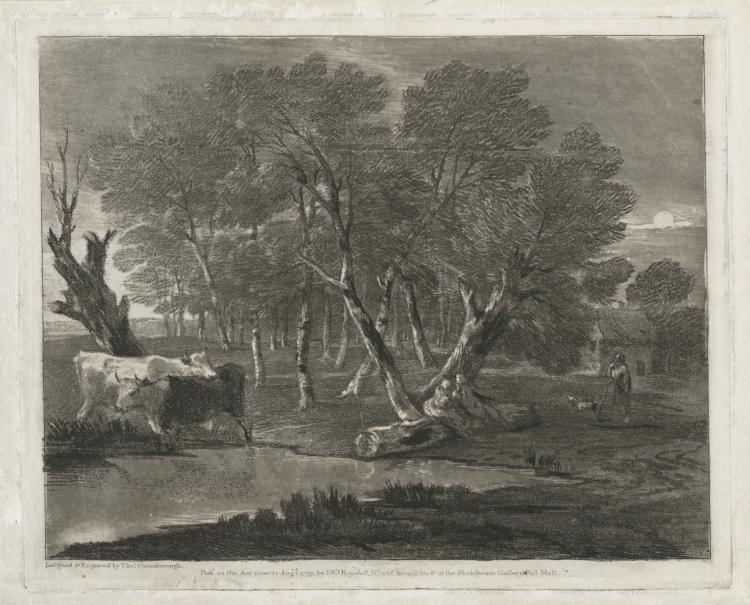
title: Wooded Landscape with Cows beside a Pool, Figures and Cottage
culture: England, 18th century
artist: Thomas Gainsborough (British, 1727–1788)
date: published in 1797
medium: softground etching and aquatint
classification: Print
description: Gainsborough was one of the first English artists to attempt original work using the newly invented techniques of aquatint and soft-ground etching. His almost impressionistic handling of these new media was perfectly in keeping with his chalk, pencil, and washed sketches of the landscape. The freshness and vitality of Gainsborough’s original prints, all published posthumously, place them among the greatest of all original English landscape prints.